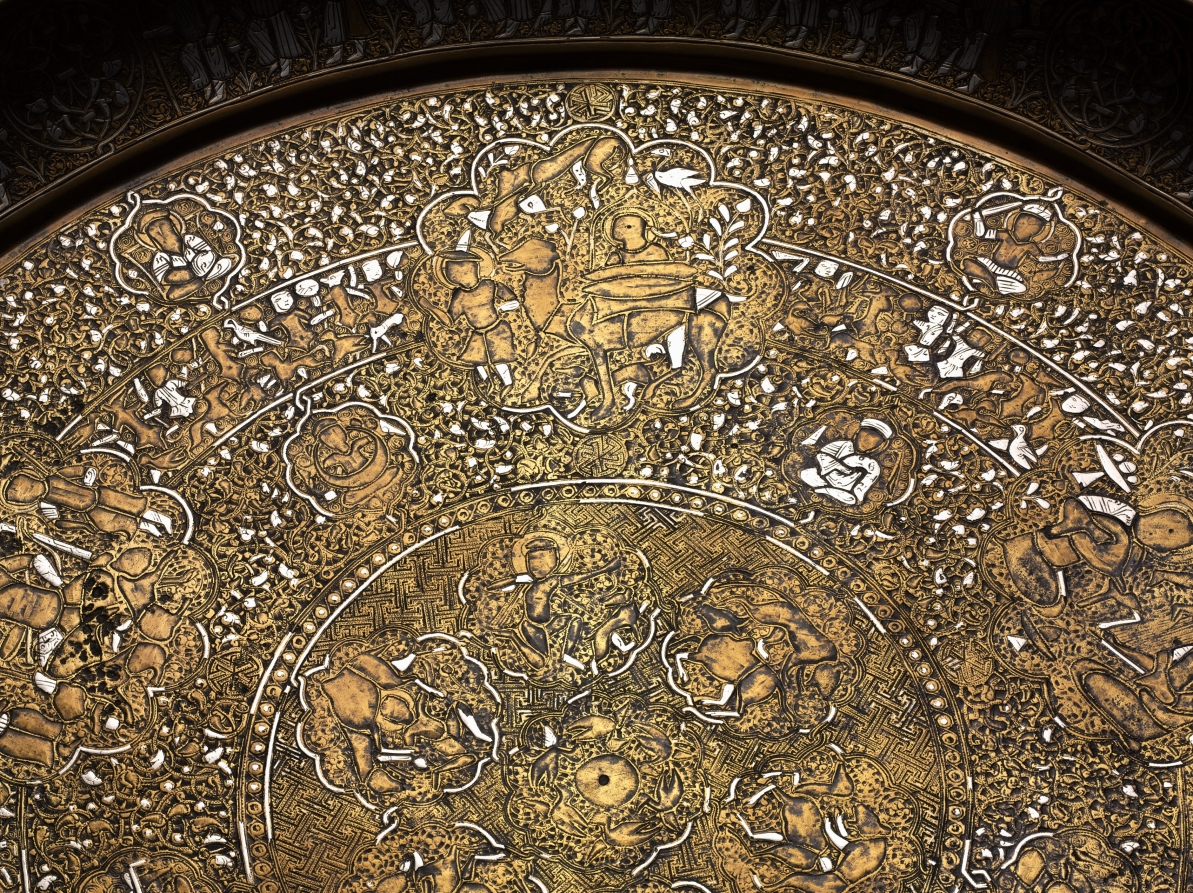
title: Tray Portraying Courtly Pleasures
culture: Syria, Ayyubid period (1171–1260)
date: 1240s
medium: sheet brass inlaid with silver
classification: Metalwork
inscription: The presence of ligatures in the narrow circular bands with interconnected human and animal figures suggests this may be a degenerate form of animated script. It is indecipherable.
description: This tray features images of courtly life interspersed with astronomical symbols. The scenes contained within large multilobed medallions display an enthroned prince with lions at his feet, a banquet, a hunt, dancers, and musicians. Contained within the concentric circles there are also references to solar and lunar motifs, including figures holding sunbursts and lunar crescents. This tray is made of a single sheet of brass and the silver inlay, which is best preserved on the tray’s inner curve, suggests its original brilliance.